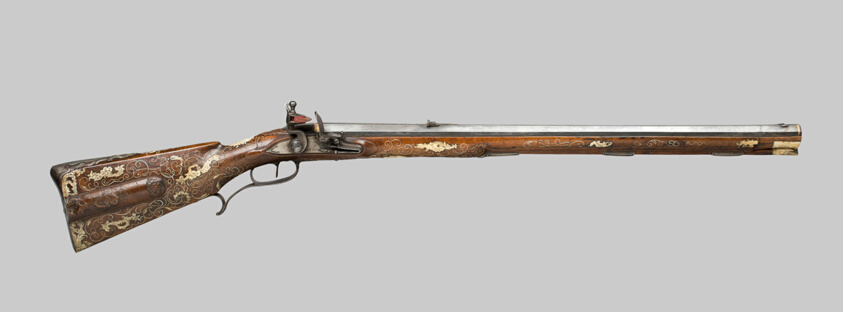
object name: Arms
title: Flintlock Rifle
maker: Barrel: Gotfried; Austrian, Vienna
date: c. 1750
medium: Walnut, steel, gold, and horn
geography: Vienna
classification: firearm-long gun; arms; arms and armor